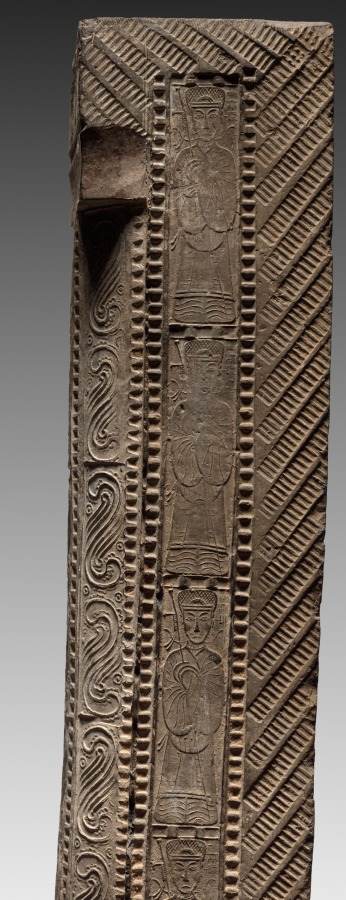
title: Hollow Tile: Column from Tomb-Chamber Doorway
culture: China, Han dynasty (202 BCE–220 CE)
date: 100–200 CE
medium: earthenware, die-stamped relief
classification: Ceramic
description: Striding tigers (top), racing horsemen (right column), and reverent officials (left column) are stamped into the surface of this underground portal to a tomb. The doorway preserves in stone the post-and-lintel structure, a basic element of Chinese wooden architecture. By the first century AD, a revolution in Chinese tomb construction and furnishing had taken place. Tombs lined with decorated bricks and tiles replace the earlier tombs constructed with only rammed earth-walls. Ceramic surrogates or models of stoves, houses, servants, and pets filled these more durable chambers, symbolically extending the creature comforts of this world into the world after death.